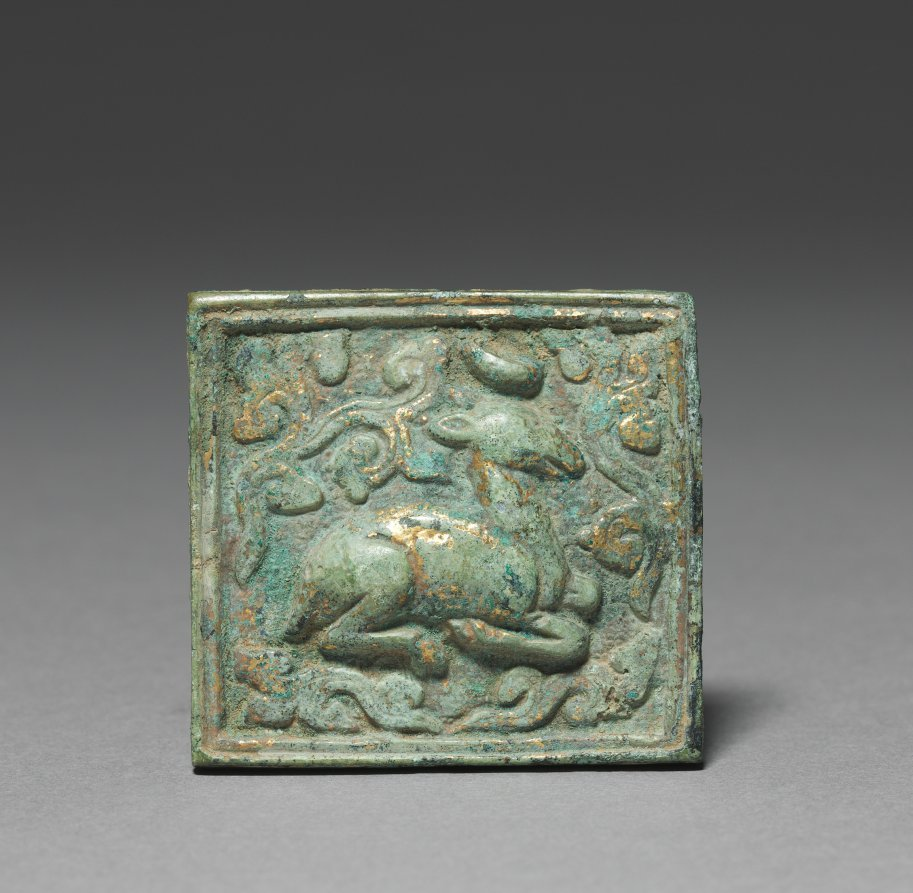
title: Belt Ornament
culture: Korea, Goryeo dynasty (918–1392)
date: 1100s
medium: gilt bronze with repoussé relief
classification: Metalwork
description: Metallurgy advanced remarkably in the Goryeo period (918-1392), explaining why a large quantity of sophisticated metal artifacts with delicate designs were used not only as daily accessories but also as burial goods. Belt ornaments like this example were fixed to leather belts. Surround by intricate arabesque patterns, a seated dear was done in the repoussé technique. Such animal motifs were widely shared among Eastern Eurasian tribes, from where the first settlers in the Korean peninsula originated.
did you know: The Japanese antique dealer Yamanaka & Company, which opened its branches in New York (1895) and Boston (1899), sold small Korean archaeological materials such as this belt ornament to American collectors in the early 20th century.